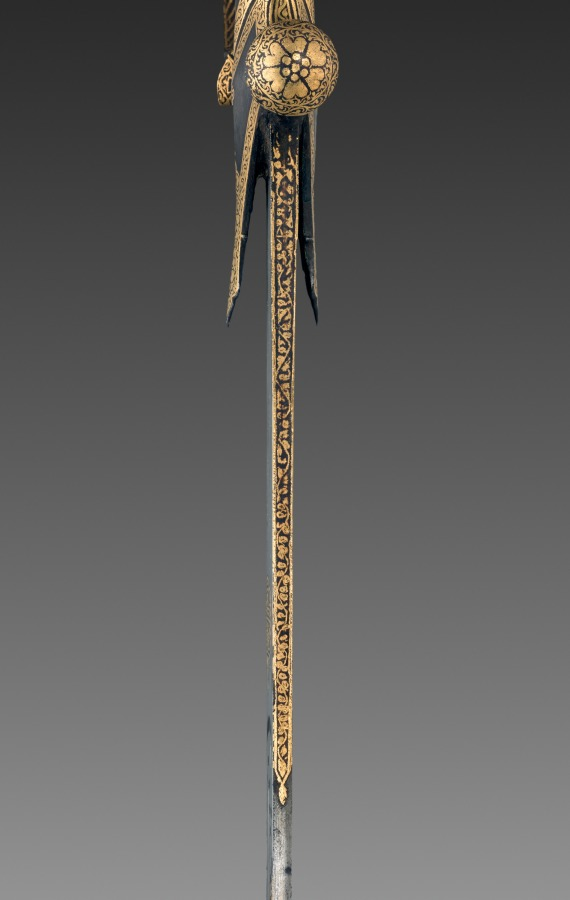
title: Silapa Sword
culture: India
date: 1700s–1800s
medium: gold with inlay and leather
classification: Arms and Armor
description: The exceptionally thin, curved blade is made of watered steel. The grooves, called fullers, allowed for weight reduction and prevented flexion. The costly hilt is fully overlaid with brass in steel, both inside and outside the knuckle.